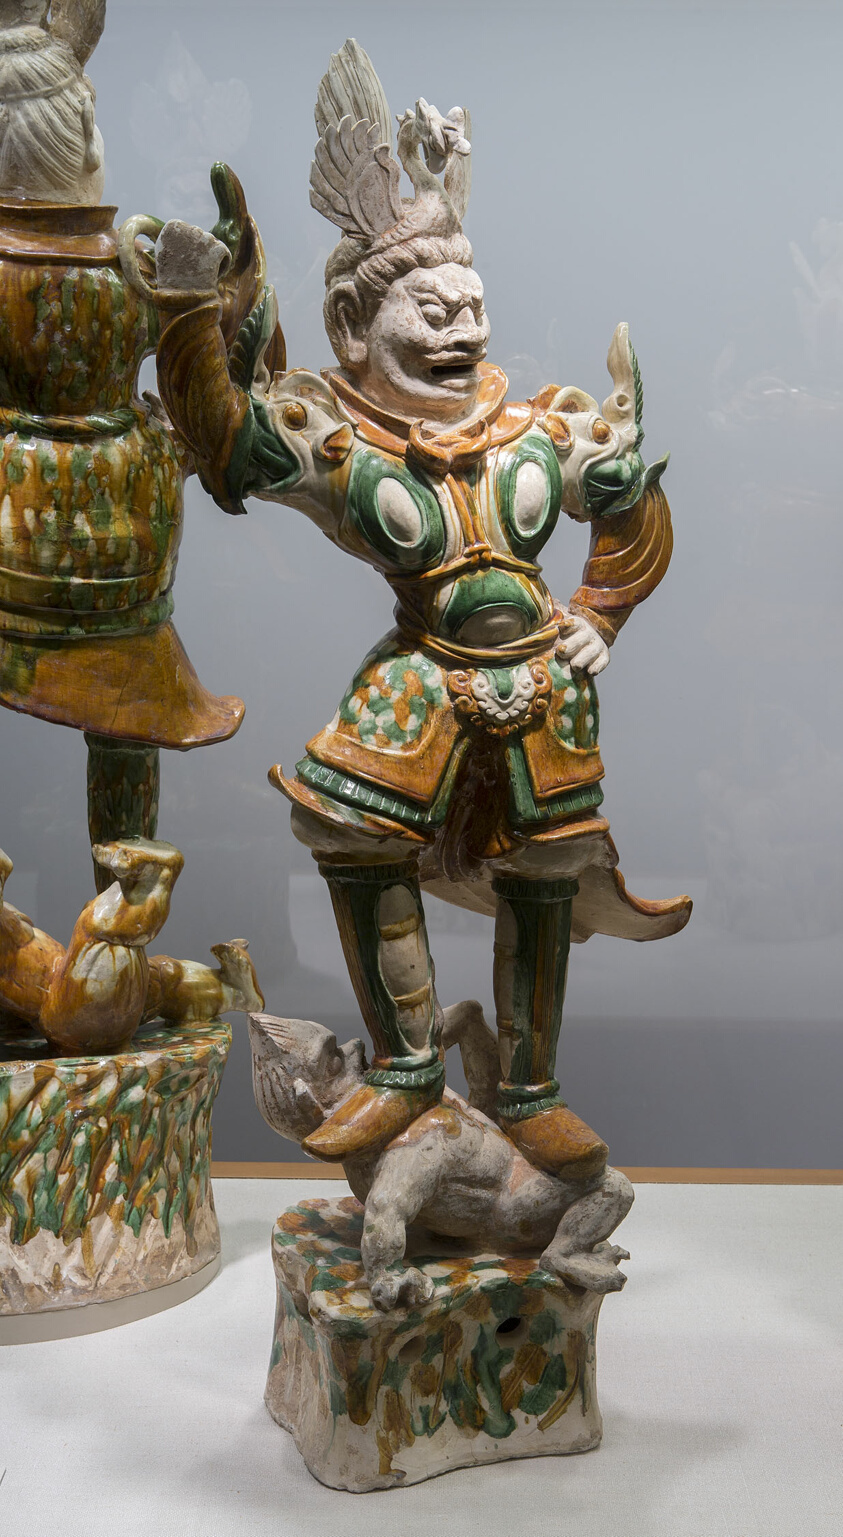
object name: Sculpture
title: Armored Guardian King (Tianwang) Trampling Demon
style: Chinese (culture or style)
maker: China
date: Tang dynasty (618–907), first half of 8th century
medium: Earthenware with three-color (sancai) lead glazes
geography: China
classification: earthenware; ceramics; asian art; sculpture